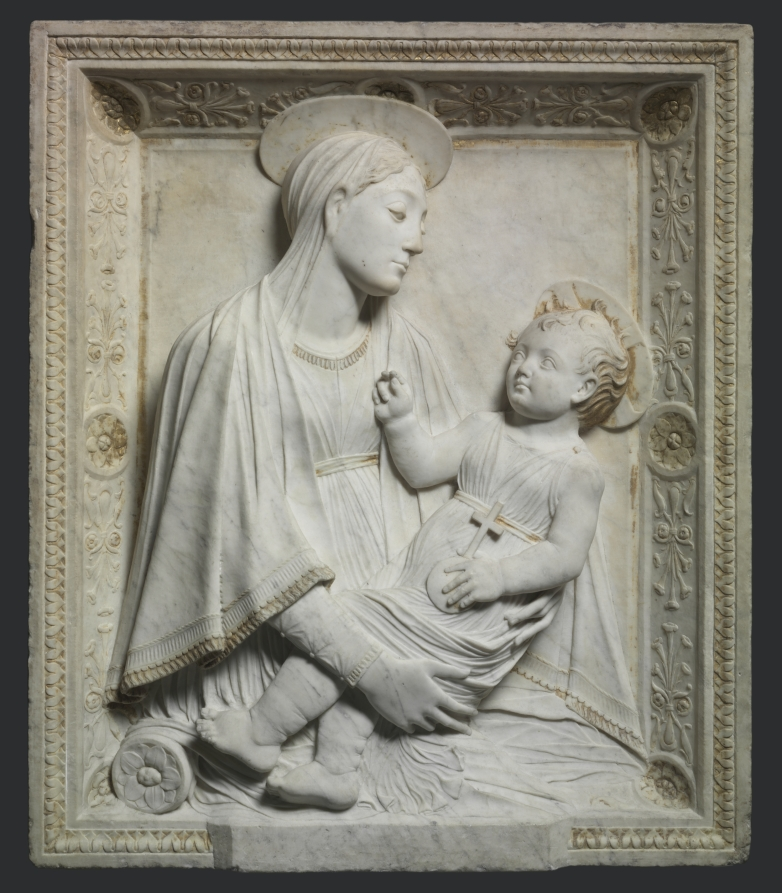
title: Madonna and Child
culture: Italy, Rome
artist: Mino da Fiesole (Italian, c. 1430–1484)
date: by 1461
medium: marble with traces of gilding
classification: Sculpture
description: This relief is one of four produced for the ciborium (canopy) erected by Cardinal Guillaume d'Estouteville over the high altar of the church of Santa Maria Maggiore in Rome. The ciborium was taken apart in 1747 and the other three panels--Christ Blessing, The Annunciation, and Saints Peter and Paul--were set into the walls of the sacristy.